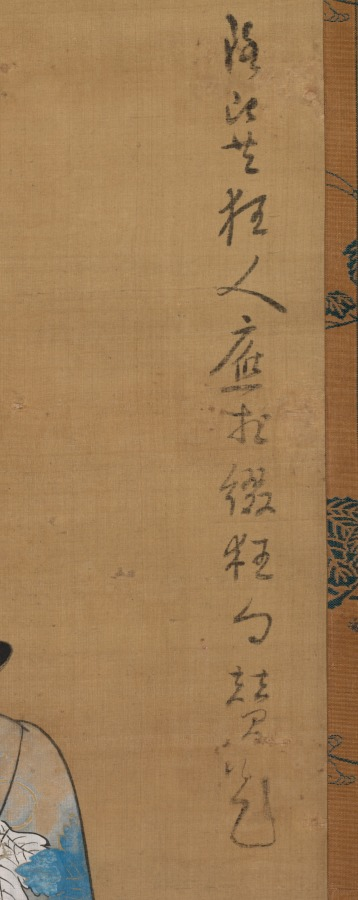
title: Courtesan Seated on a Bench Enjoying the Evening Cool in Summer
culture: Japan, Edo period (1615–1868)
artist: Kamigaki Hōryū (Japanese, dates unknown)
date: 1615–1868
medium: hanging scroll, ink and color on silk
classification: Painting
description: In a pensive pose with her chin resting in her hand, a courtesan is seated on a wooden bench that extends diagonally across the lower half of the scroll. Her open robe suggests that it is a warm evening-perhaps late summer or early fall, as indicated by the grapevine pattern on her kimono. The floral patterns in the composition hint at the seasons: the plum blossom on the fan for spring; grape pattern on the robe for late summer; and chrysanthemum design on the bench indicating autumn. Note also how the grapevine pattern in the painting's mounting mimics the design of her kimono. The overall mood is one of intimacy, created by Hõryþ through the delicate rendering of the courtesan's facial features and hands. In contrast to the other scrolls of beauties nearby, the artist here portrayed his subject with little background, allowing her grace and elegance to carry the picture.